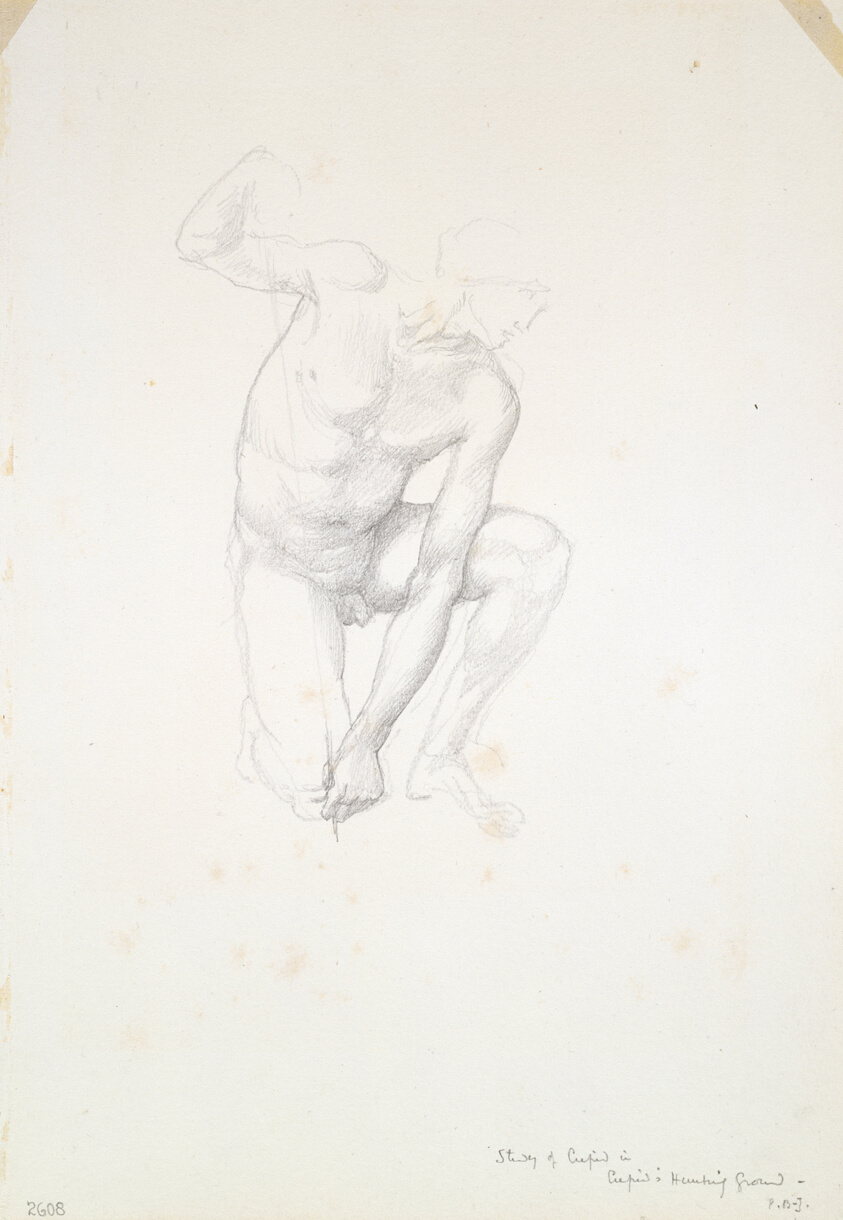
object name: Drawing and Watercolor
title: Study for Cupid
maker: Sir Edward Burne-Jones (English, 1833-1898)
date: c. 1873–77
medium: Graphite on ivory wove paper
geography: England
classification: graphite; drawings (visual works); prints and drawing